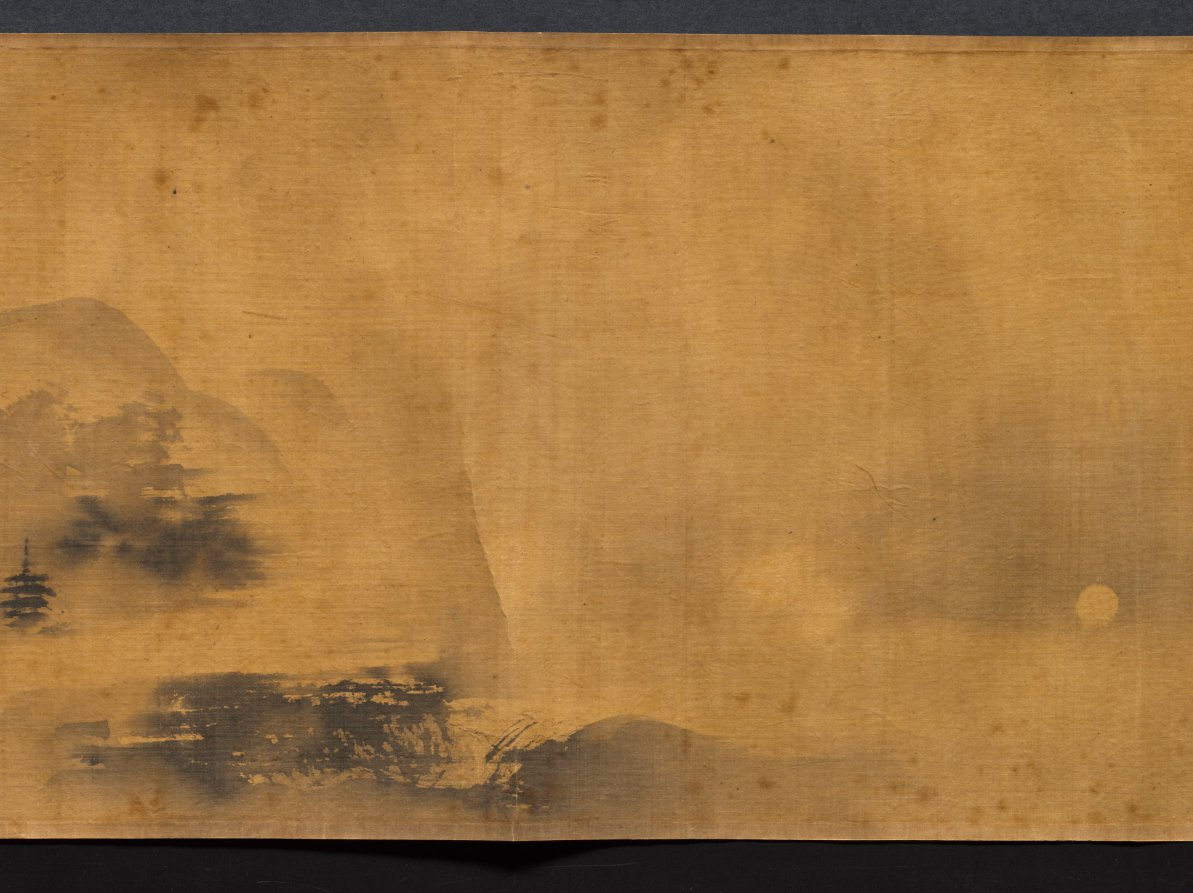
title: Eight Views of Xiao-Xiang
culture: Japan, Edo period (1615–1868)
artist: Kano Tan’yū (Japanese, 1602–1674)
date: 1615–1868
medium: handscroll; ink on silk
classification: Painting